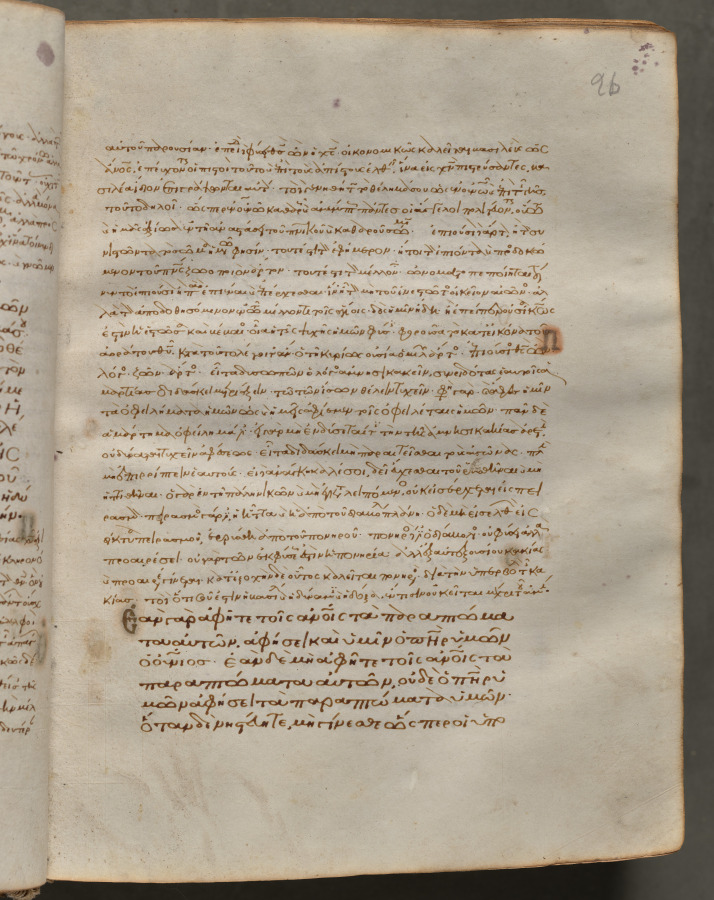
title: Text, folio 26 (recto), from a Gospel Book with Commentaries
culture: Byzantium, Constantinople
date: c. 1000–1100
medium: ink, tempera, and gold on vellum; leather binding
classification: Bound Volume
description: Each of the four gospels in this book opens on a page with brilliantly illuminated borders depicting the author of the text as well as birds—principally peacocks, symbols of the immortality of the soul—and fountains, representing the fountain of life and the salvation of the soul. This volume consists of 428 leaves with texts in Greek. Its level of sophistication suggests that it was probably written and decorated in a monastery in Constantinople.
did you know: Gospel books were carried in procession through Byzantine churches.